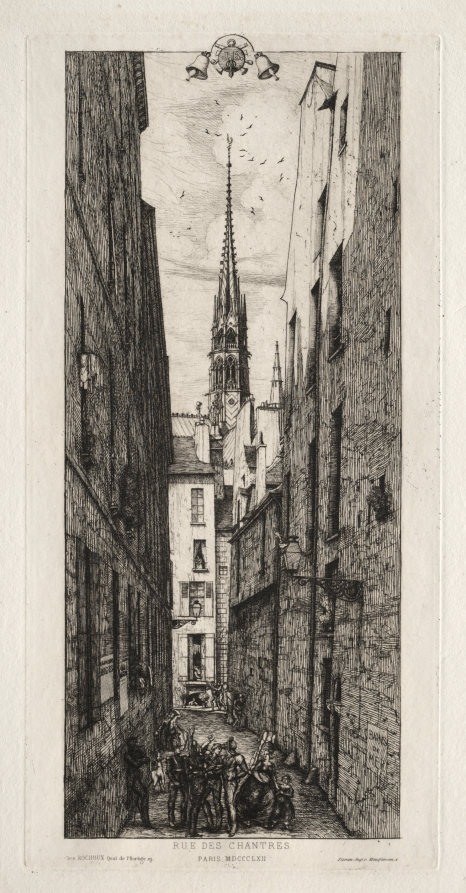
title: Chantrey Street, Paris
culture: France, 19th century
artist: Charles Meryon (French, 1821–1868)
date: 1862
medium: etching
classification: Print